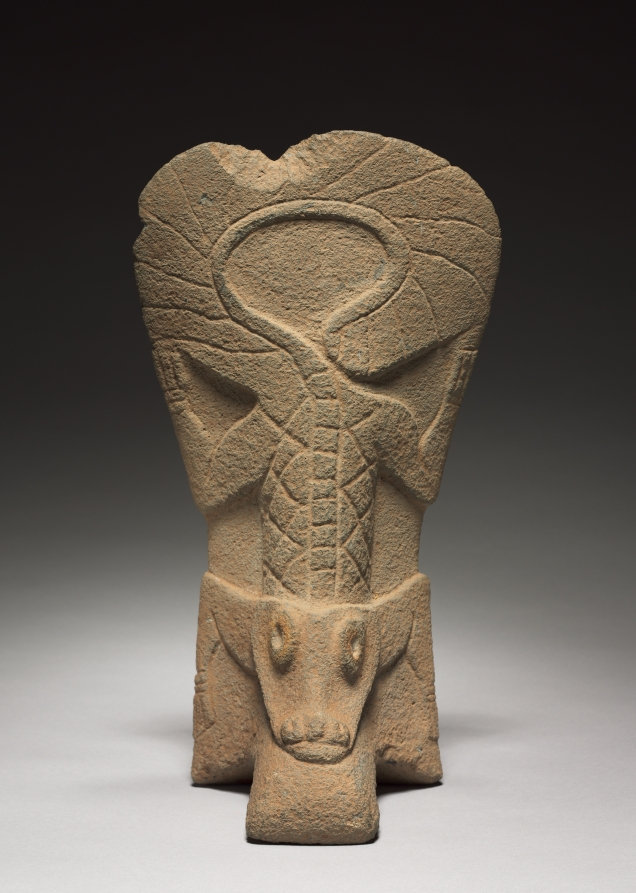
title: Ballgame Palma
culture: Mexico, Gulf Coast, Classic Veracruz style (600-1100)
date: 900–1100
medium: stone, pigment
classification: Sculpture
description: Stone palmas, so-called today for their palm-frond-like shape, are ceremonial sculptures that may replicate lightweight gear worn over the chest during the ballgame. Palma imagery is not well-studied and the meaning of the caiman (New World alligator) carved on both sides of this example is unknown. The tail is beautifully adapted to the palma's curved upper edge.